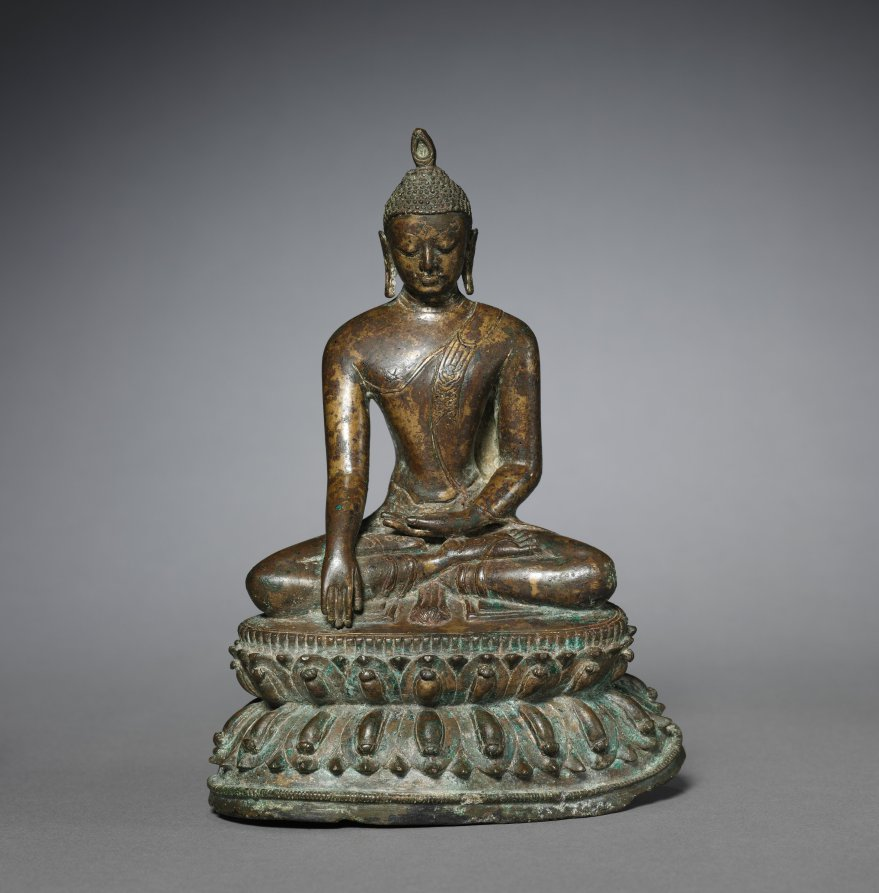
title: Sakyamuni Buddha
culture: Burma, Pagan style, 12th century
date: 1100s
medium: bronze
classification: Sculpture